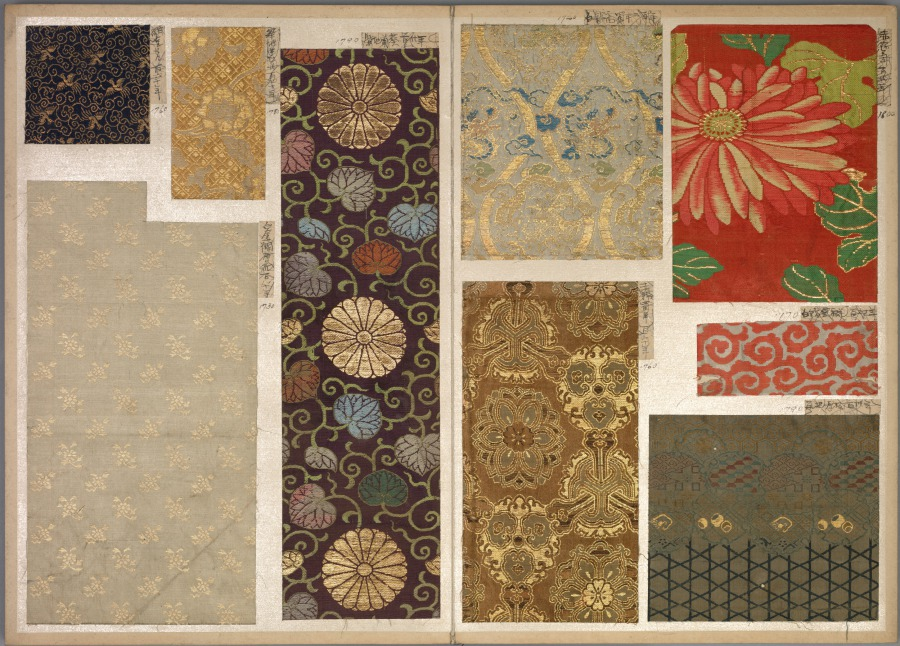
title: Album of Textile Samples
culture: Japan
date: 1790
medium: silk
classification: Textile